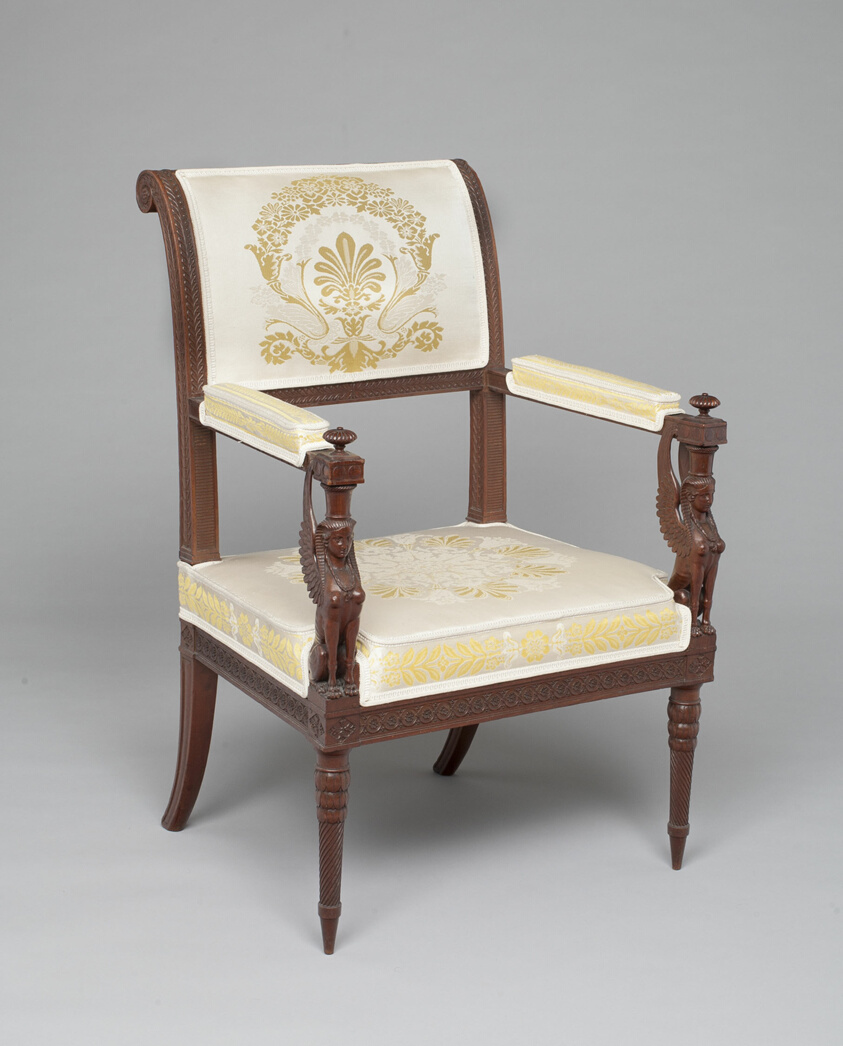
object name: Furniture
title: Armchair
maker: Georges Jacob; French, 1739–1814; Paris, France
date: c. 1795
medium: Mahogany, modern reproduction upholstery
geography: France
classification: seating; furniture; european decorative arts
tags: furniture